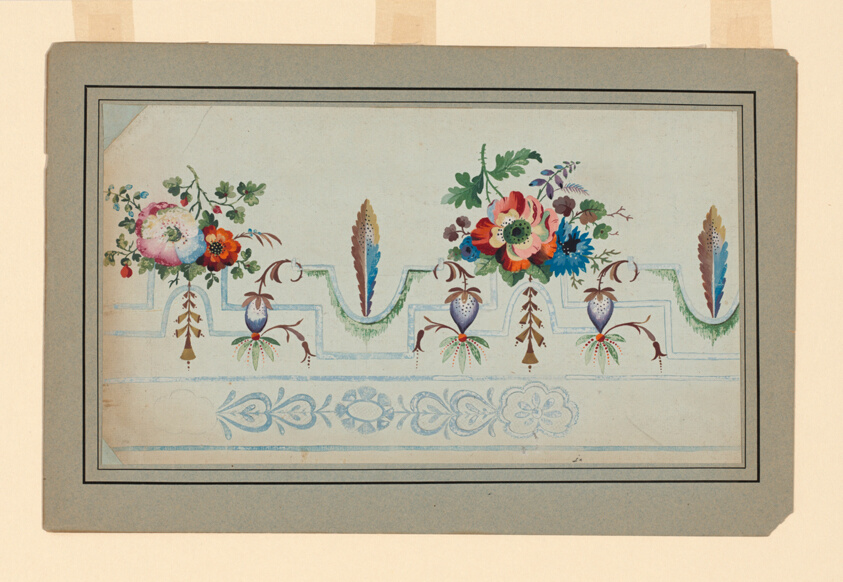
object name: Textile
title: Design for a Woven or Embroidered Fabric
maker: France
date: early 19th century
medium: Gouache on paper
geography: France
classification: textile; accessory - paper design; accessories (object genre)